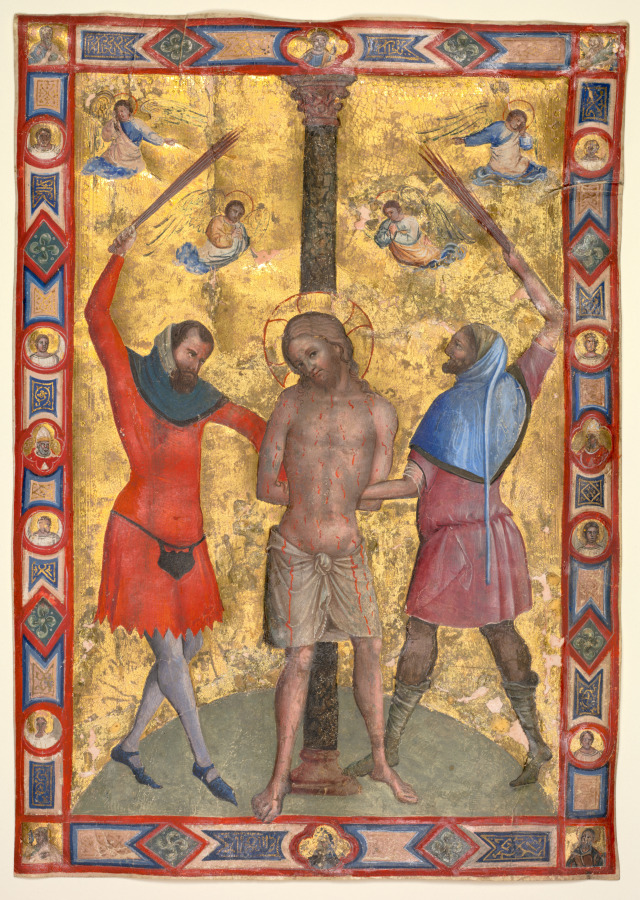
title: Miniature from a Mariegola: The Flagellation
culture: Italy, Venice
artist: Lorenzo Veneziano (Italian)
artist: and Workshop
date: c. 1365–75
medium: tempera and gold on parchment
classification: Manuscript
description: This miniature shows a moment of Christ’s Passion. After receiving his death sentence, Jesus was bound to a column, mocked, and tortured. While two fearsome henchmen beat Jesus with rods, he seems to look directly at the viewer and make a connection with them. The leaf comes from a rule book of a Venetian scuole, a mariegola. Scuole were guilds and lay associations mainly for religious purposes but also for trades and crafts. Five of them were associations of flagellants, a radical movement that became particularly popular since the 1350s in the wake of the Black Death. Christ’s physical suffering served as their model for self-chastisement.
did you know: Although dark in appearance now, the column in the center was originally painted to resemble green marble.